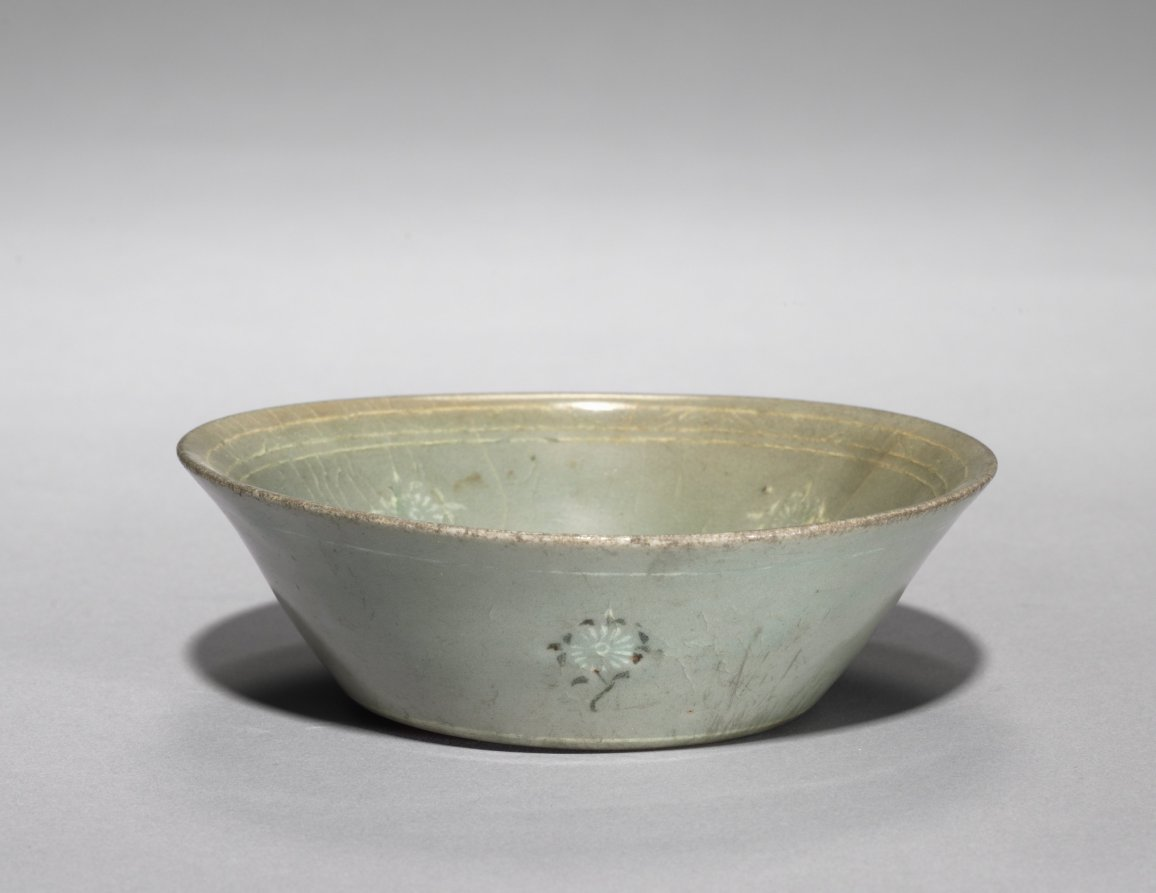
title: Saucer with Inlaid Chrysanthemum Design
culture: Korea, Goryeo dynasty (918–1392)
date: 1200s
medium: pottery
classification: Ceramic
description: During the Goryeo period (918–1392), about 260 kilns operated in mainly Jeolla and Chungcheong provinces, meeting a high consumer demand. Celadon wares for everyday use such as this dish were among the most common burial objects in elites' tombs. Furnishing tombs with an elaborate assemblage of objects was believed to honor and comfort the newly dead. Generally, Goryeo tombs were left untouched until the late 19th century. During the colonial period (1910–45), however, Japanese archaeologists competitively excavated the tombs located in Kaeseong, the former capital of the Goryeo period, and these wares soon became available for Japanese and Western collectors.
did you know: On the base of this tea bowl, three small spur marks made of bits of clay remain visible, indicating an individual protective casing of fire clay (saggar).